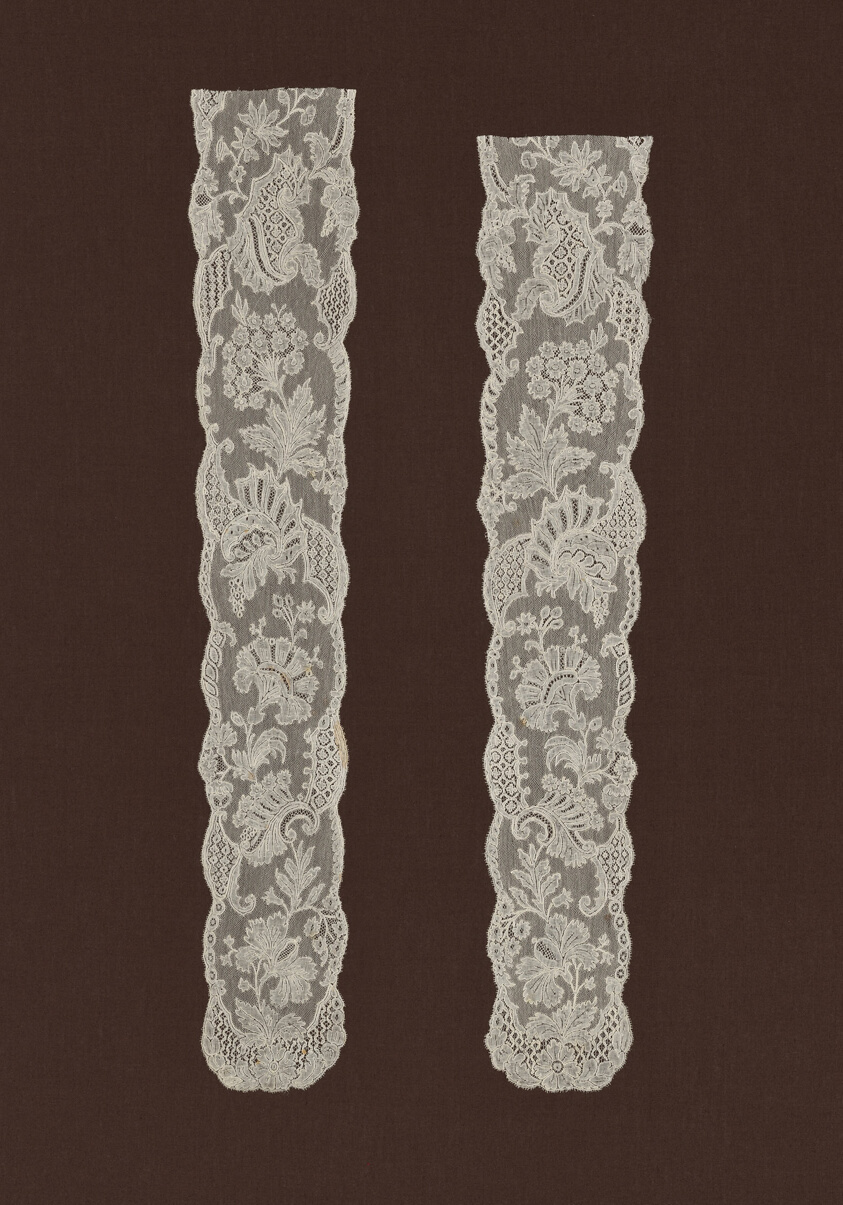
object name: Costume and Accessories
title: Pair of Lappets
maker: Belgium, Flanders, Mechlin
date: 1750s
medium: Linen, bobbin straight lace of a type known as "Mechlin" with a Mechlin mesh ground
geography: Mechelen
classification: costume accessory; lace - bobbin; textile; costume; costume accessory - headdress; costume accessory worn above the waist